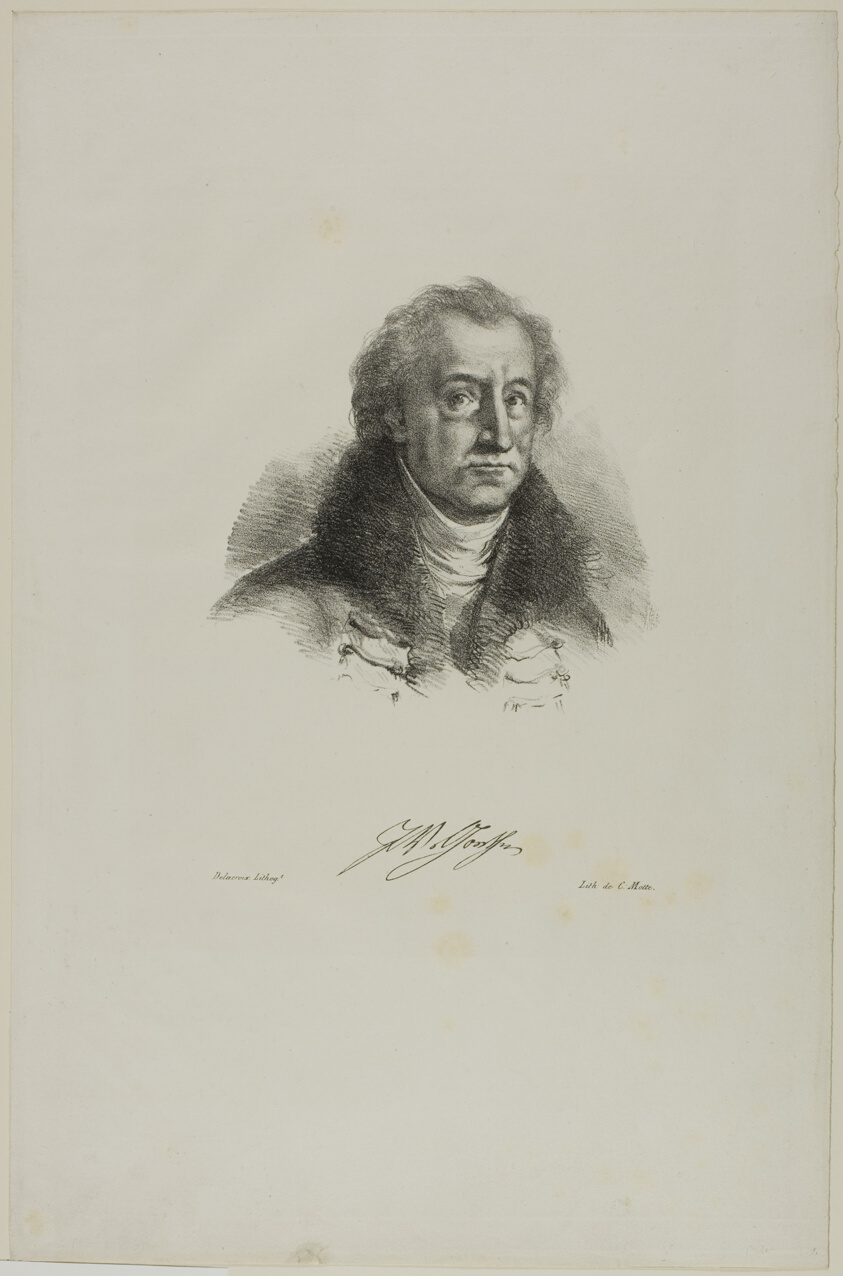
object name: Print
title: Portrait of Goethe, from Faust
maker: Eugène Delacroix (French, 1798-1863)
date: 1827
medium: Lithograph in black on white wove paper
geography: France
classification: lithograph; print; prints and drawing